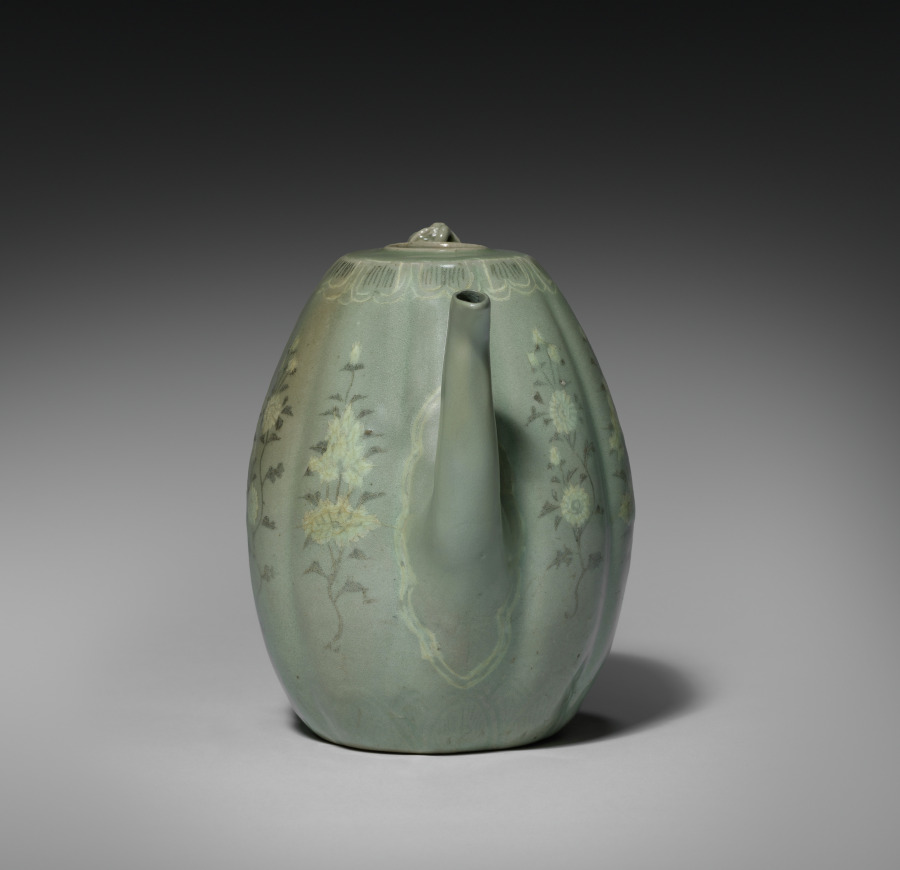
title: Pitcher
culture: Korea, Goryeo dynasty (918–1392)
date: 1100s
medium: celadon ware with inlaid white and black slip decoration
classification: Ceramic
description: The chrysanthemum is the flower of autumn. In East Asia, its wine was believed to bring longevity if drunk during the Double Nine Festival (September 9). "Drinking Wine," a poem by Tao Yuanming (365–427), combines the flower with the theme of the reclusive life: "From the eastern fence, I pluck chrysanthemum flowers, and idly look toward the southern hills." In Korea, the chrysanthemum was established as a popular motif for Goryeo inlaid celadon as early as the 1100s. The flower was used as the main motif for wine service vessels in particular. When Koreans drank wine from Goryeo celadon decorated with chrysanthemum designs, they believed that Tao’s faithful spirit transferred to their inner mind, as did the blessings of longevity.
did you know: The shape of this pitcher resembles is a type of yellow muskmelon cultivated mainly in East Asia.